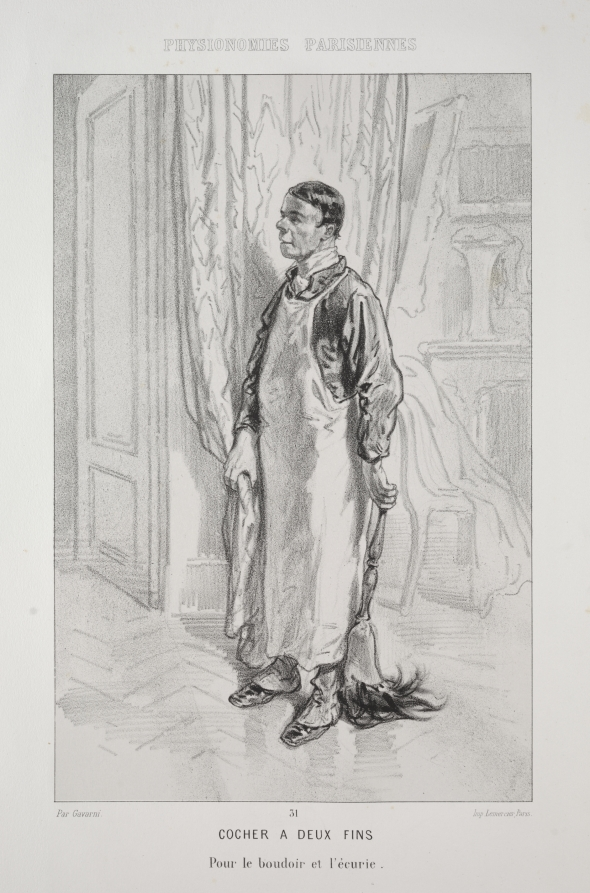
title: Cocher à deux Fins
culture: France, 19th century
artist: Paul Gavarni (French, 1804–1866)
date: c. 1857–58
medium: lithograph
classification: Print